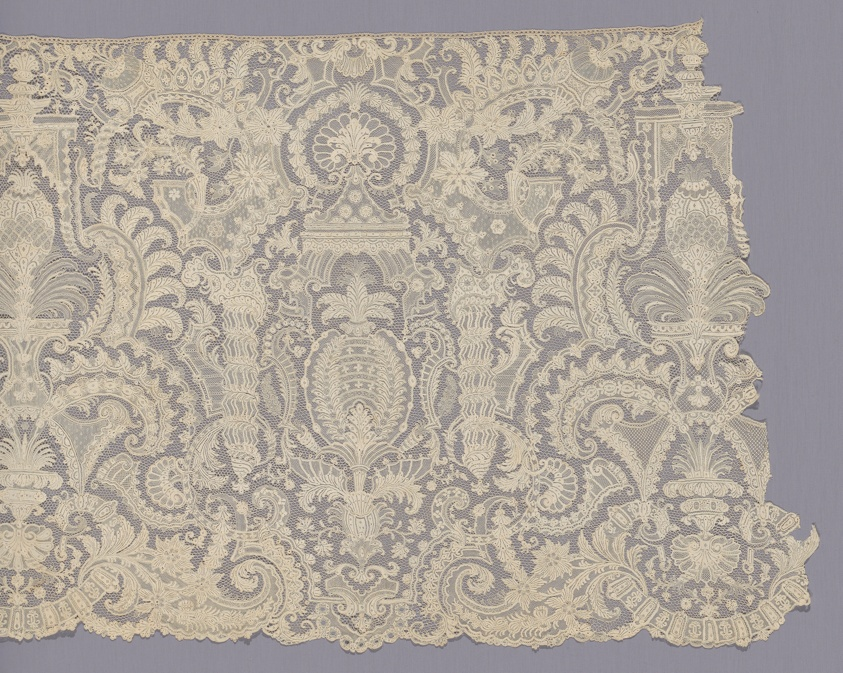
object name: Costume and Accessories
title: Flounce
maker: France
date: 1701/25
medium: Linen, needle lace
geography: France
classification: textile; lace - needle; costume component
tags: fashion, arabesque, cartouches, columns, pineapples